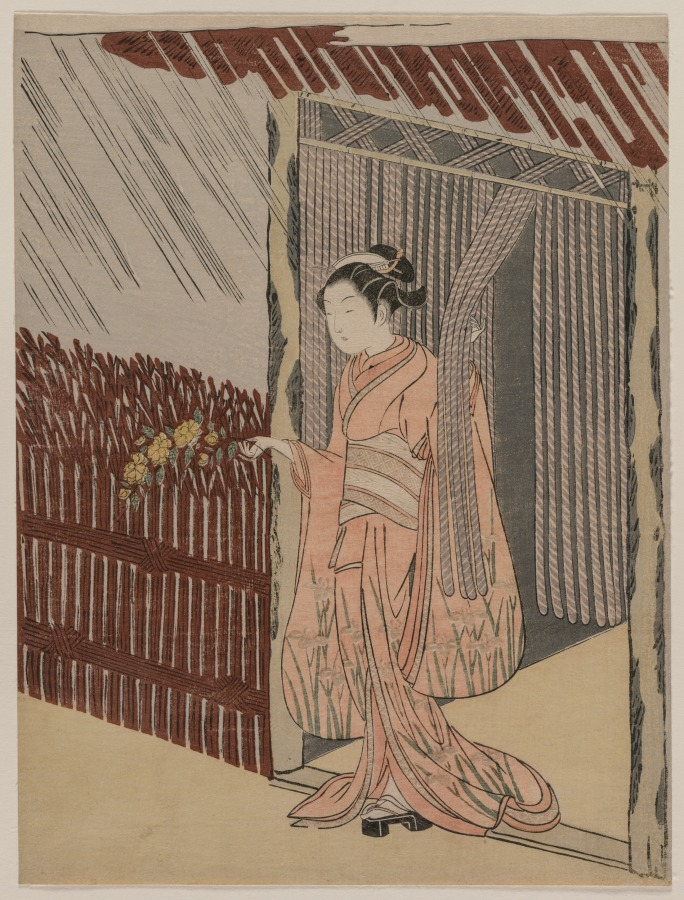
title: A Girl Dressing in Pink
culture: Japan, Edo period (1615–1868)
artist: Suzuki Harunobu (Japanese, 1724–1770)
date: 1766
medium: color woodblock print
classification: Print